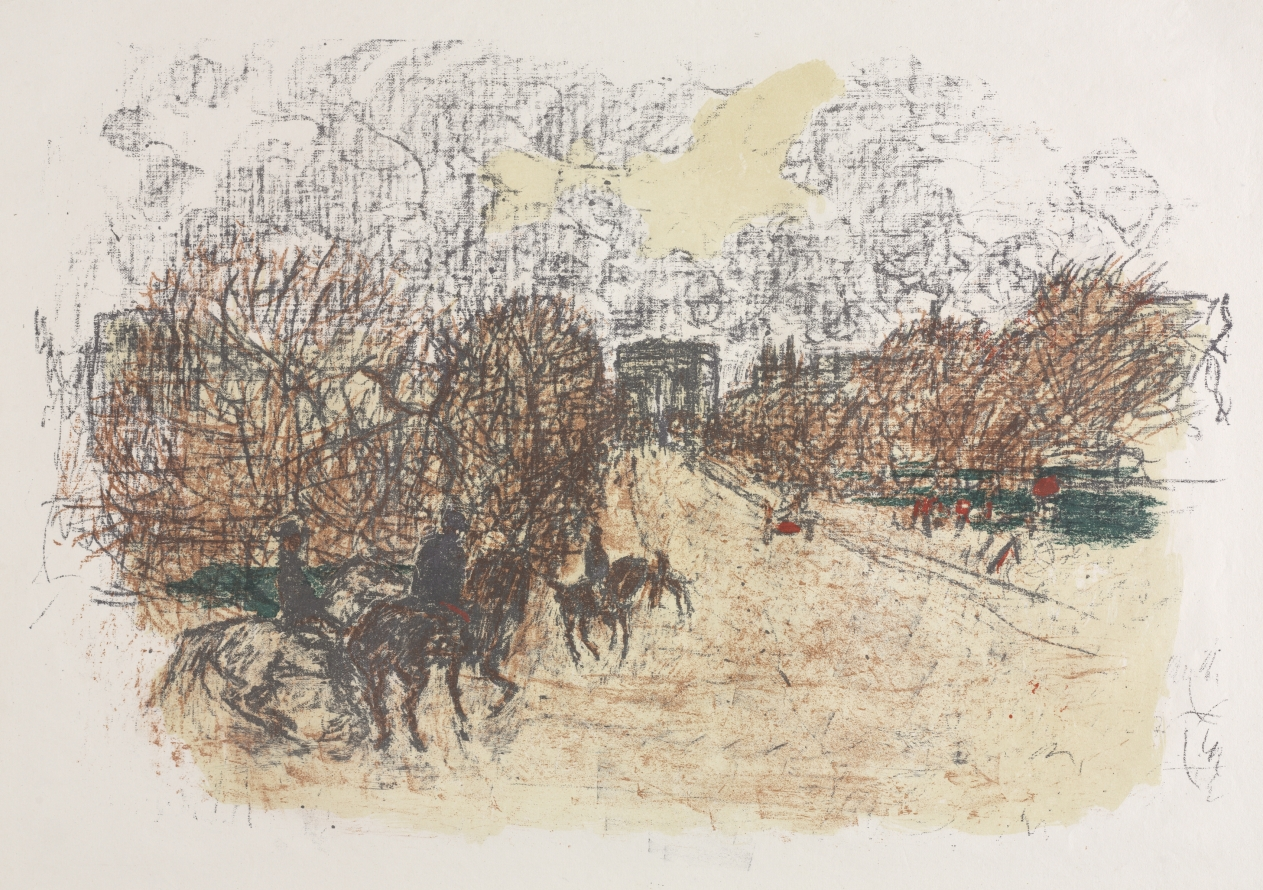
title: The Arc de Triomphe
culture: France, 19th century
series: Some Scenes of Parisian Life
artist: Pierre Bonnard (French, 1867–1947)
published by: Published by Ambroise Vollard; Printed by Auguste Clot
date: 1899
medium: lithograph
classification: Print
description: This suite of color lithographs collected Pierre Bonnard’s observations of city life, ranging from animated street scenes to distant observations glimpsed from the artist’s Montmartre studio window. Rather than memorializing the famous monuments of Paris, Bonnard preferred to depict small neighborhood scenes populated by urbanites shopping and strolling and by vendors selling their wares. The setting for one of the prints is the second-largest public park in Paris, the Bois de Boulogne, which was a popular place for families to relax, stroll, and enjoy carriage rides around the lakes. Two prints are nocturnal scenes in which gaslight emanating from shop windows is reflected on the wet streets, creating passages of bright yellow in the otherwise dark compositions. Bonnard’s favorite subjects, such as the Parisienne—a young, fashionable, modern woman—as well as children and dogs, appear repeatedly throughout the prints in the suite.